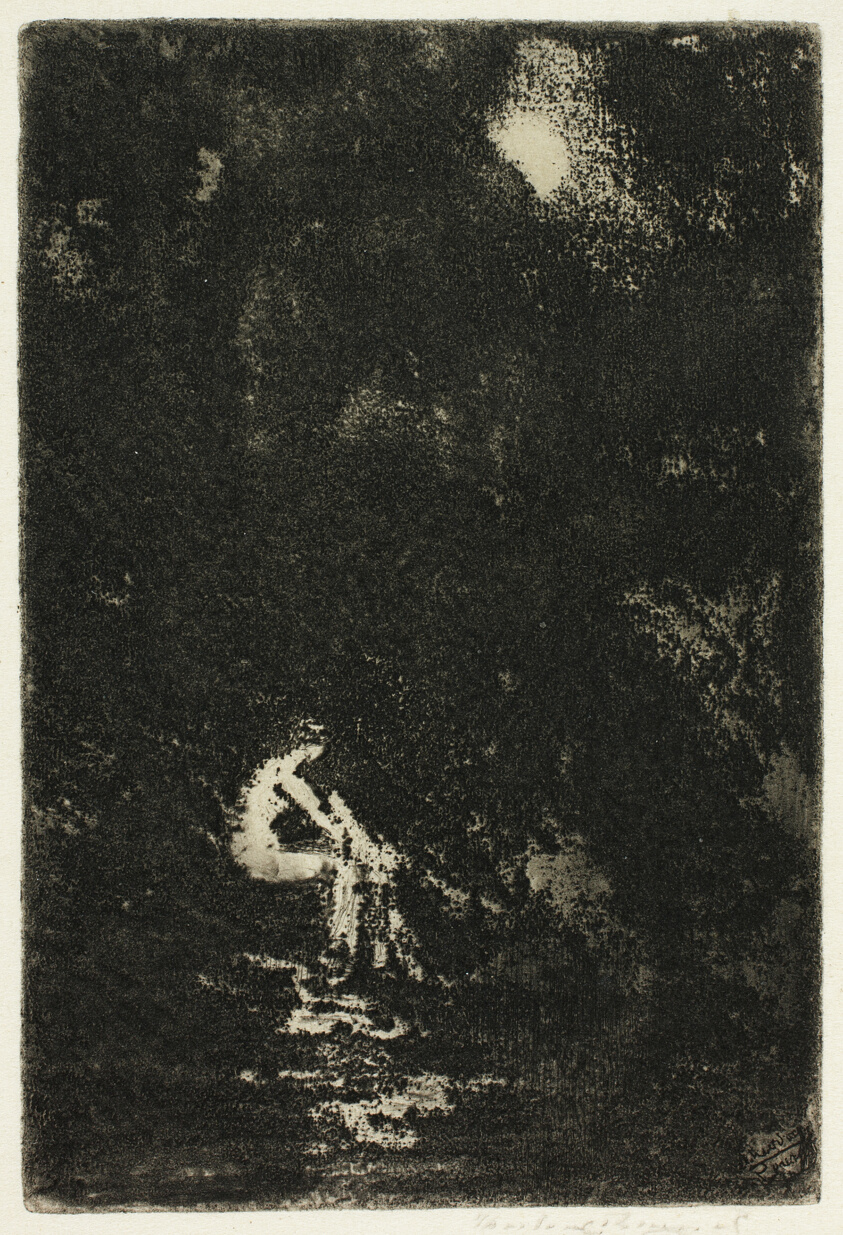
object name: Print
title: A Nymph Bathing, Moonlight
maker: Theodore Roussel (French, worked in England, 1847-1926)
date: 1890–1900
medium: Soft ground etching, aquatint, and drypoint in black on thin cream Japanese paper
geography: England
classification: etching; paper; print; prints and drawing